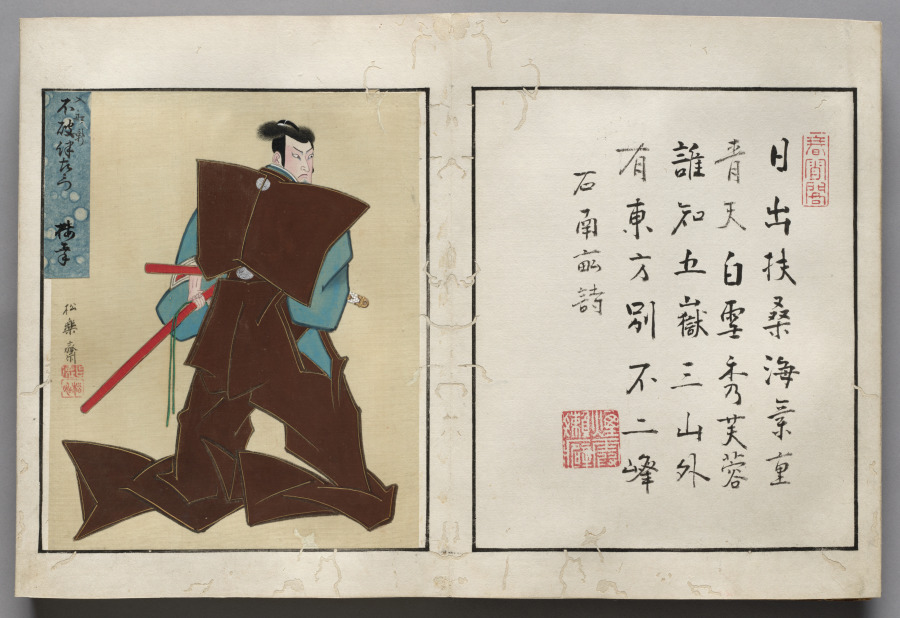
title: Double-Leaf from Album of Actor Portraits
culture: Japan, Edo period (1615–1868)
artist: Shōrakusai (Japanese)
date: c. 1790–1810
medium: double-leaf from an accordion-style album; ink on paper (right) and ink and color on silk (left)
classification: Bound Volume